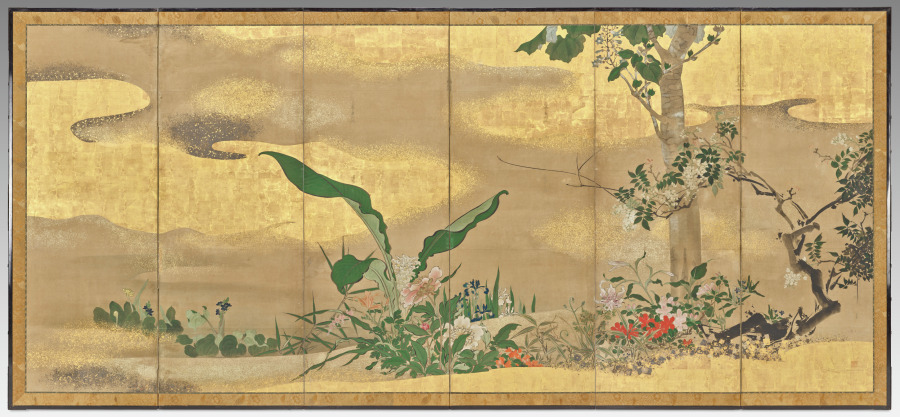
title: Flowers and Trees of the Four Seasons (right screen)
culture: Japan, Edo period (1615–1868)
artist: Watanabe Shikō (Japanese, 1683–1755)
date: early to mid-1700s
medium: Six-panel folding screen; ink, color, gold, silver, and gilding on paper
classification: Painting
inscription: 始興之印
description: The painter Watanabe Shikō had a special interest in scientific realism, based on interactions with his patron Konoe Iehiro. Shikō combined his attention to accurate depiction of plants with strong ink outlines and decorative elements like gold and silver, arriving at an innovative style that influenced many of his peers in the city of Kyoto.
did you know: One plant in these screens, tumeric, or ukon in Japanese, is found in Okinawa.